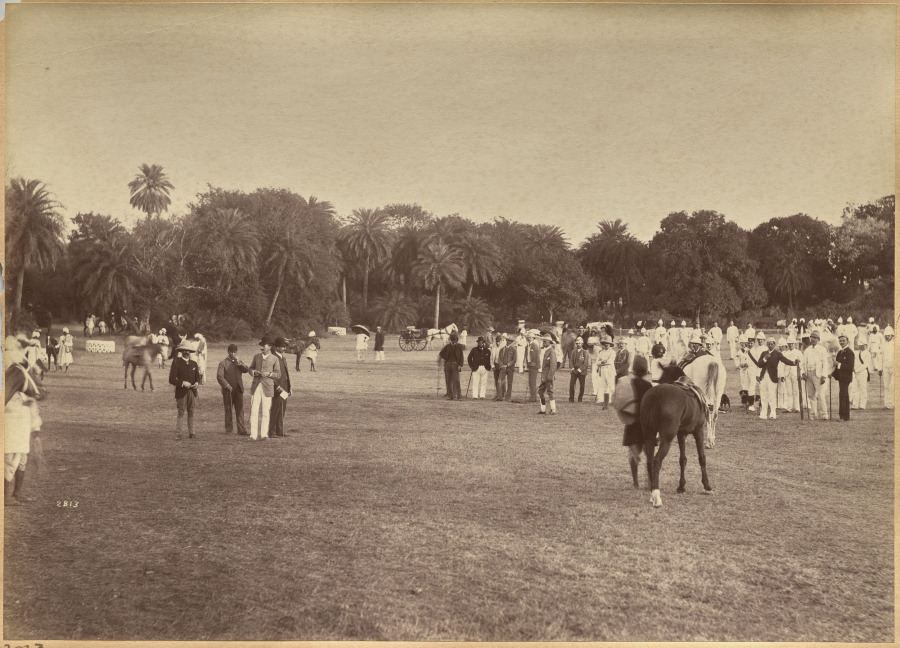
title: Judging at the Horseshow at Jhansi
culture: India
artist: Raja Deen Dayal (Indian, 1844–1905)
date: c. 1882–87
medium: albumen print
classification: Photograph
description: These photographs are part of an album, now disassembled, of around 105 photographs taken in India between 1885 and summer 1887 that provide glimpses into the lives of the British colonial elite and royal and upper-class Indians. The museum holds another group of 37 pictures from this album (2016.266), which was probably commissioned by a British civil servant visiting or working in India around 1888 as a personal souvenir of his experiences there.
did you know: Raja Deen Dayal is regarded now, and was considered during his lifetime, to be India’s most important 19th-century photographer.